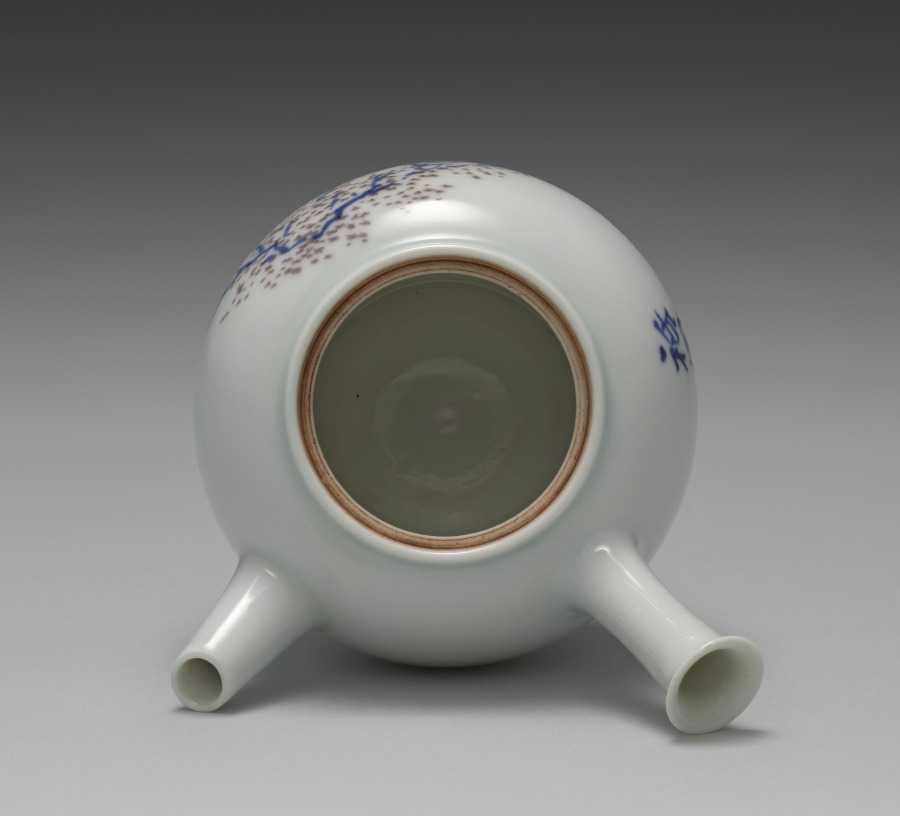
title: Teapot with Cherry at Night in Gion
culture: Japan, Meiji period (1868–1912)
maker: Seifū Yohei III (Japanese, 1851–1914)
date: 1893–1914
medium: Porcelain with underglaze blue and iron oxide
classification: Ceramic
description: This side-handled sencha teapot with the cherry tree has a nearly spherical shape, and its recessed lid has an ovoid knob. It has both blue and a purplish brown under the glaze for the blossoms and embers on one side, and the vertical calligraphy identifies the tree as a cherry tree at night in the Gion area of Kyoto. To the right of the tree, smoke billows from a small lantern fire in a basket suspended on a post. In terms of collecting history, a paper inserted into the box of Teapot with Cherry at Night in Gion is of interest. It is a flyer for Yamamoto Shōseidō, a shop (no longer extant) that sold fine Kyoto ceramics in Osaka.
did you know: This teapot features the Japanese theme of a blossoming cherry tree in the Gion area of Kyoto in underglaze blue and brown.